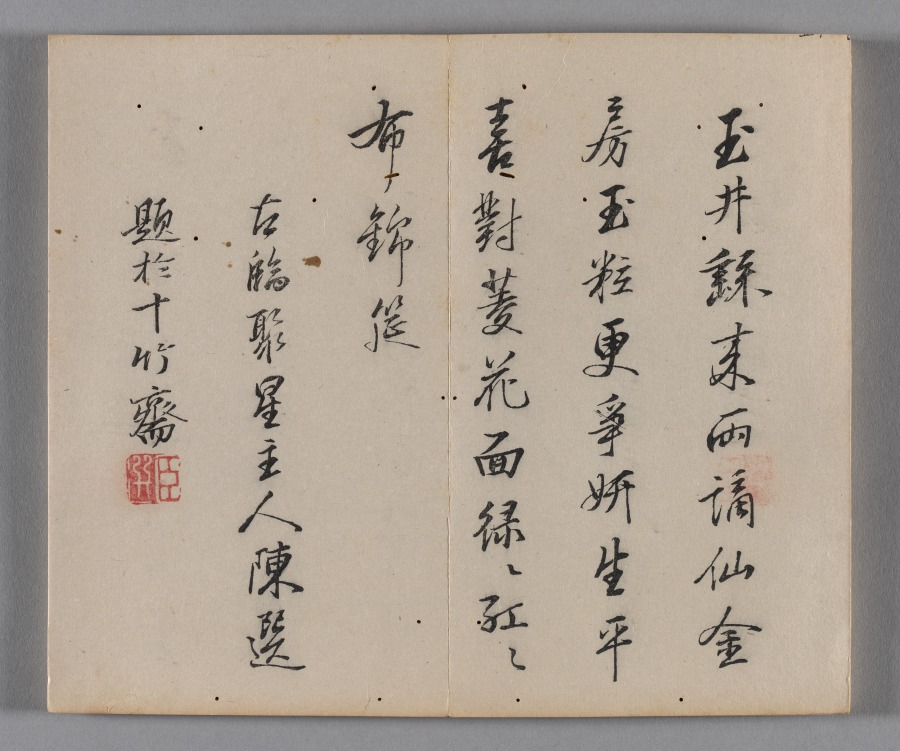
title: Ten Bamboo Studio Painting and Calligraphy Handbook (Shizhuzhai shuhua pu): Fruit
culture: China, Qing dynasty (1644-1911)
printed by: Hu Zhengyan (Chinese, c. 1584–1674)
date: 1633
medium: Woodblock-printed book; ink and colors on paper; first edition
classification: Print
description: Color printing reached a level of perfection in the early 1600s, as seen in this Ten Bamboo Studio Collection of Calligraphy and Painting and the Mustard Seed Garden Manual of Painting (printed 1679 and 1701). The painterly quality, precision in registering (aligning) the woodblocks, and harmonious colors made them the most successful color print editions in Chinese history. Both editions were printed and compiled in Nanjing, spread nationwide, and had a great impact on the arts in Japan and Korea.